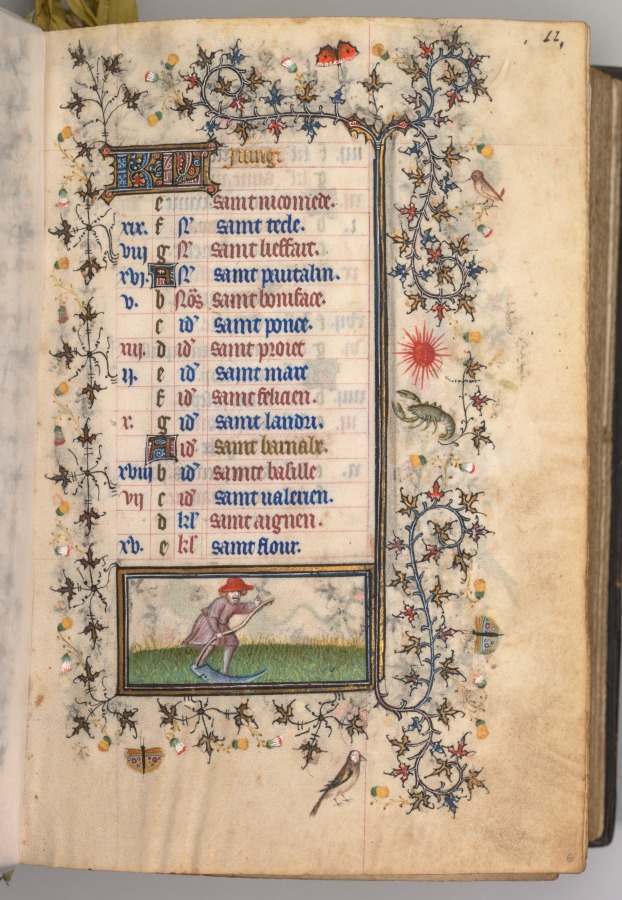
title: Hours of Charles the Noble, King of Navarre (1361-1425): fol. 6r, June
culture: France, Paris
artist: Master of the Brussels Initials and Associates (French)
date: c. 1405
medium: ink, tempera, and gold on vellum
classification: Bound Volume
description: This precious volume was obviously highly prized by its owner, the French-born King of Navarre, who had his coat of arms painted on no less than twenty folios. Rather than directly commissioning this manuscript from a specific workshop, it seems that Charles the Noble acquired his book of hours -- perhaps ready-made for the luxury market -- while on a trip to Paris in 1404-05. A collaborative effort, six painting styles are evidenced within the pages of this codex, those of two Italians, two Frenchmen, and two Netherlanders. The painter who was responsible for the planning and decoration of the book, and who produced seventeen of the large miniatures, was a Bolognese artist known as the Master of the Brussels Initials. His principal assistant, responsible for most of the borders, was a Florentine who signed his name "Zecho" da Firenze on folio 208 verso.